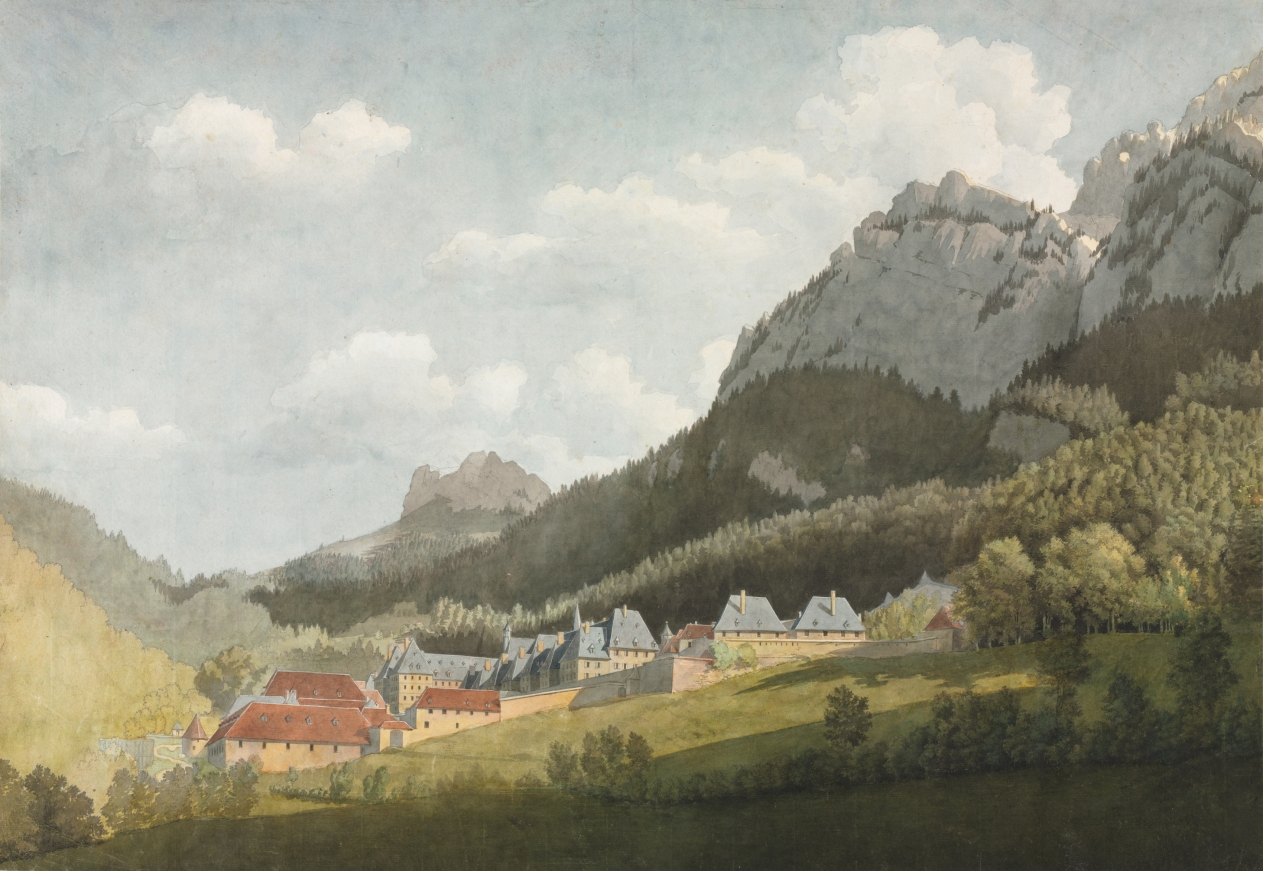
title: Paysage de la Grande Chartreuse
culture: France, 18th-19th century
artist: attributed to Jean Lubin Vauzelle (French, 1776–after 1837)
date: late 1700s-1800s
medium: watercolor with graphite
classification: Drawing